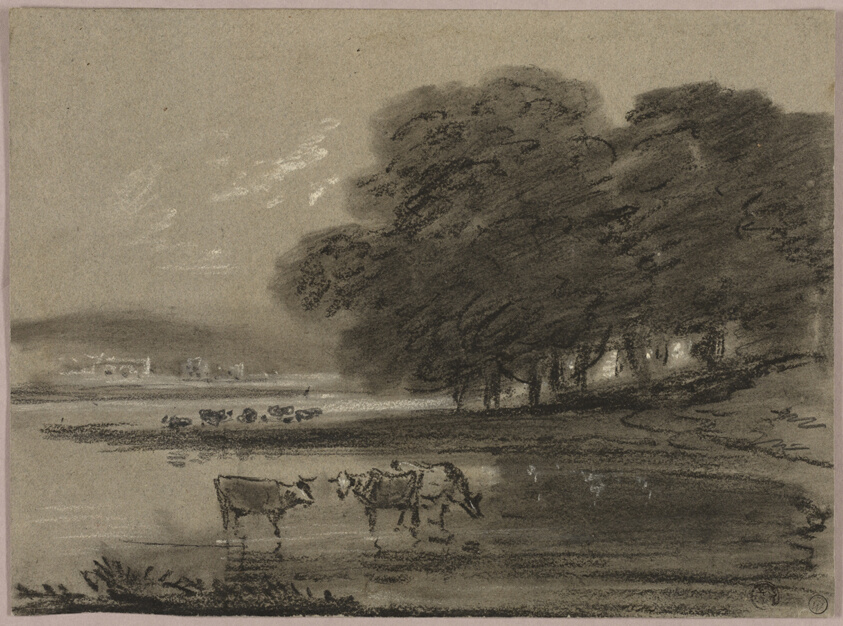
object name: Drawing and Watercolor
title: Landscape with Cows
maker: Thomas Monro (English, 1759-1833); or Thomas Gainsborough (English, 1727-1788)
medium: Black chalk, with black and white crayon, on gray wove paper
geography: England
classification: chalk; drawings (visual works); prints and drawing